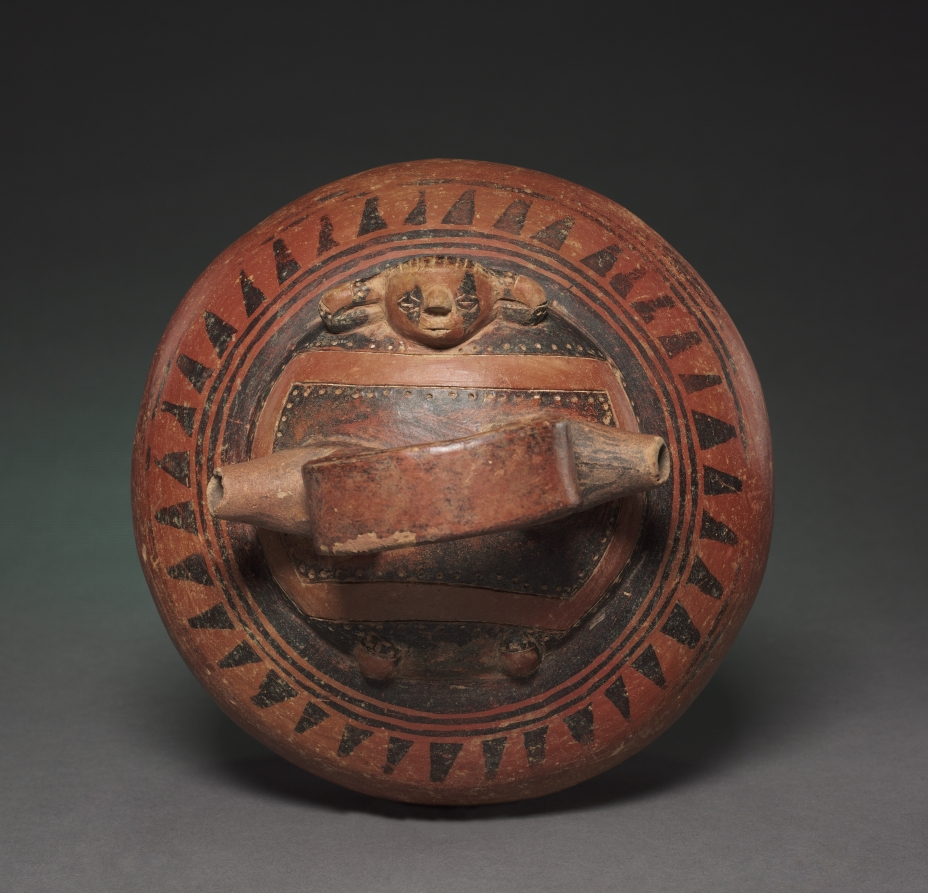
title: Double-Spouted Vessel with Reclining Figure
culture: Colombia, Calima region, Yotoco style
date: c. 1–800 CE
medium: ceramic, slip, resist paint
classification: Ceramic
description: This headdress ornament reveals a considerable flair for showmanship through its size and many suspended parts, which would have swayed and glittered with the wearer's motion. Like many other Yotoco ornaments, it features an enigmatic human face with closed eyes, a huge nose ornament that hides the lower face, and great disks that dangle from the ears.